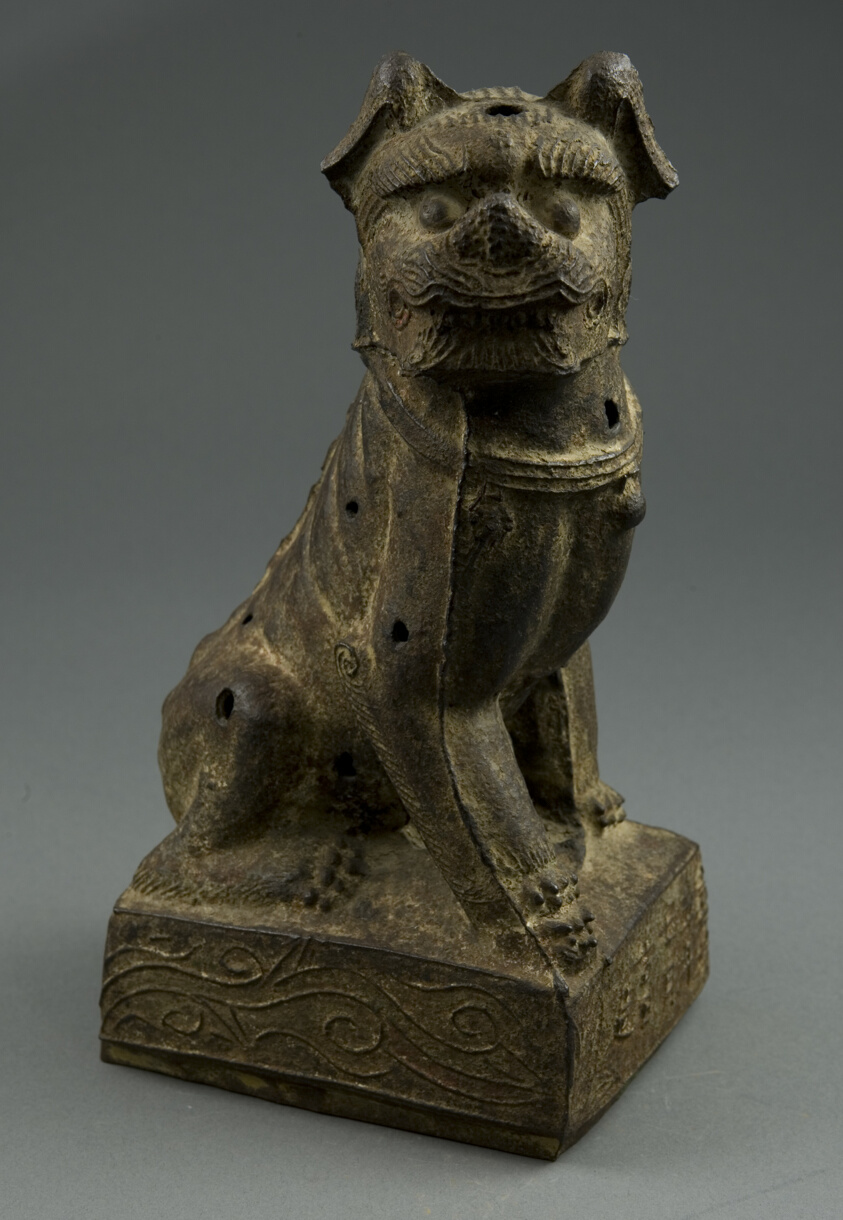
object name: Sculpture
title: Seated Lion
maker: China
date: Ming dynasty (1368–1644), Jiajing period (1522-66)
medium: One of a pair of seated lions, cast iron, with inscription containing the date of Ming Chia Ching. Other lion is 1973.795.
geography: China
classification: iron; metal; sculpture; asian art